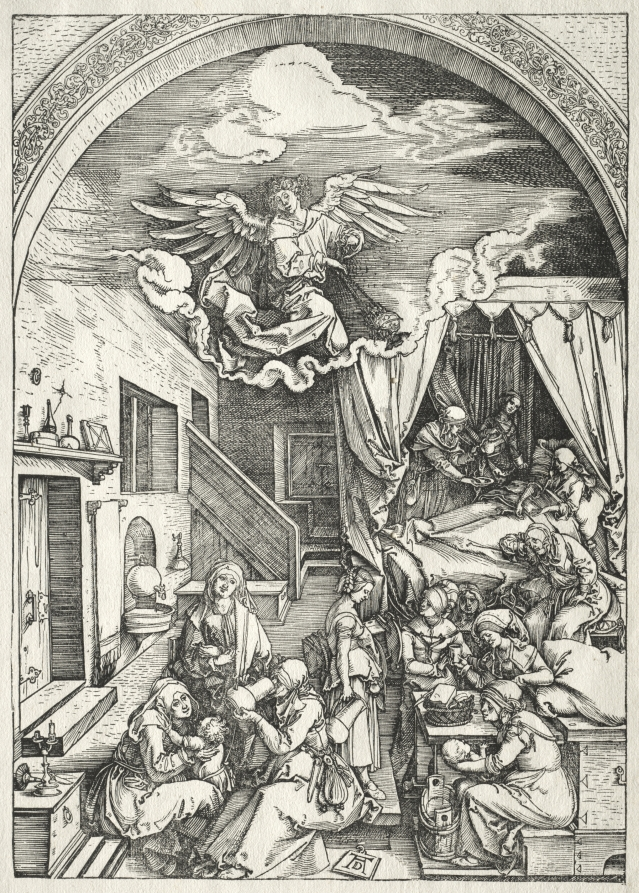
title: Life of the Virgin: Nativity of the Virgin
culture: Germany, early 16th Century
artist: Albrecht Dürer (German, 1471–1528)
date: 1504–1505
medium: woodcut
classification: Print